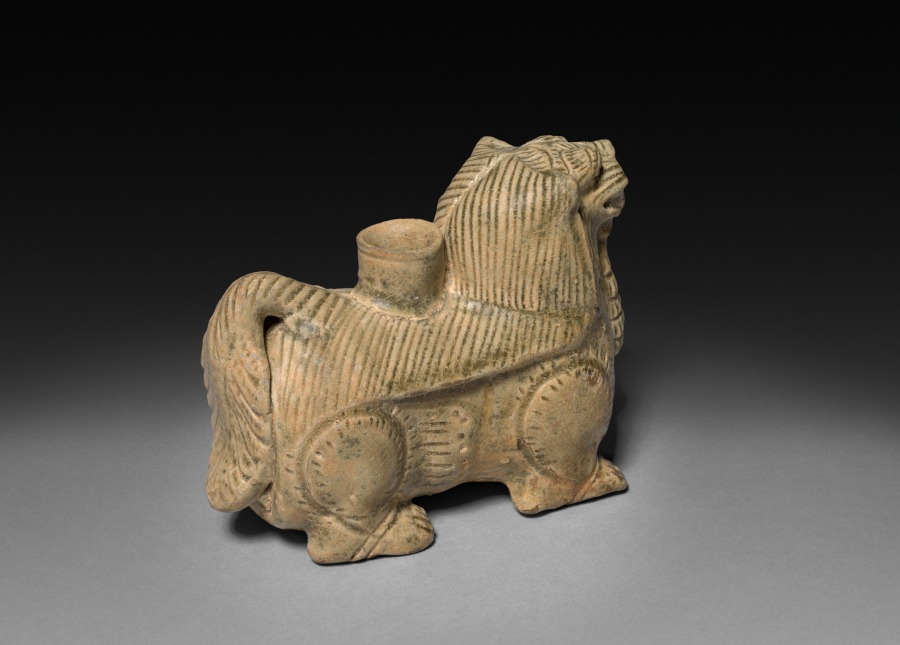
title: Candlestand in the Shape of a Chimera Bixie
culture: China, Western Jin dynasty (265-316 CE)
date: 265–316 CE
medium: Glazed stoneware with molded and incised decoration, Yue ware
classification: Ceramic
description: The candlestand in the shape of a chimera or bixie (a fantastical hybrid creature that was believed to ward off evil spirits) was molded in two parts. Incisions on both sides of the feline body suggest wings. Stone bixie placed in front of tomb entrances are prominent among the Six Dynasties kings buried in Nanjing. Candlestands in the form of chimera were found in tombs but may have been used in daily life too.